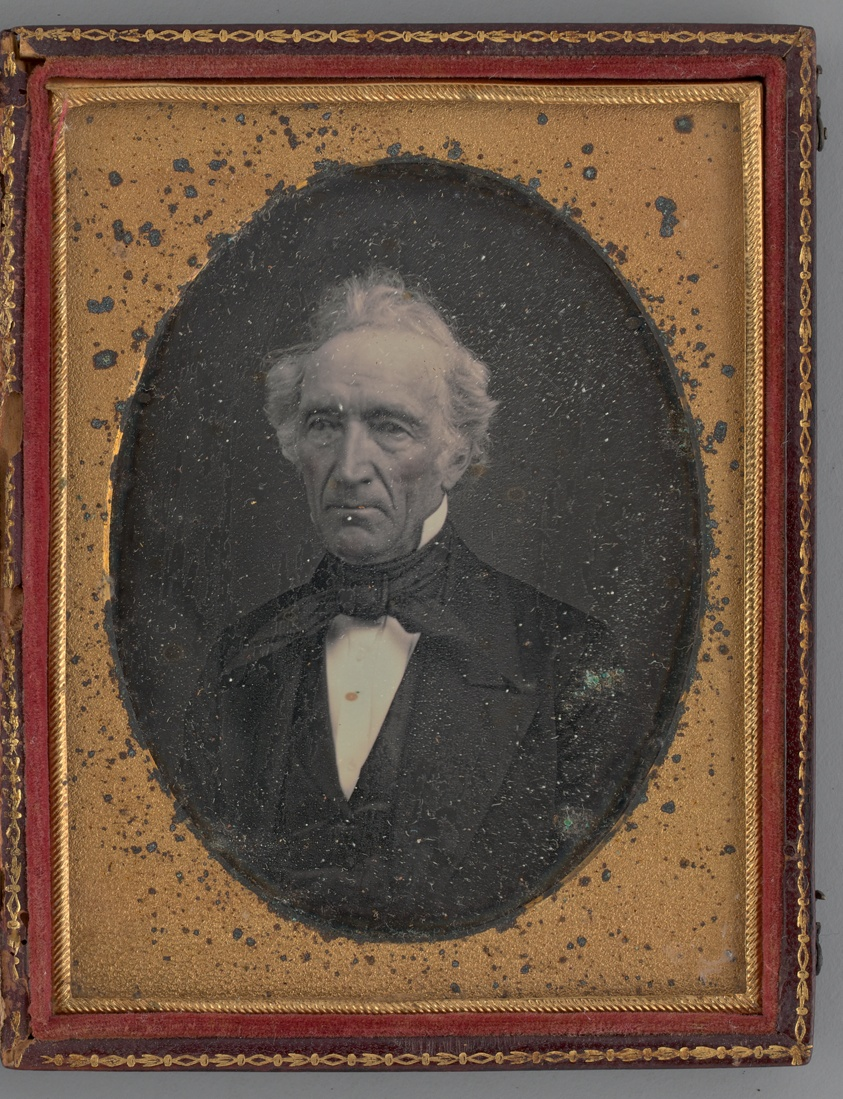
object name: Photograph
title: Untitled (Portrait of a Man)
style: 19th century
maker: Unknown maker; American, 19th century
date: 1854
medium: Daguerreotype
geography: United States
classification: portrait; photograph; photographic process; photography; portrait; daguerreotype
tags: lundberg collection, Male, portrait, portraits, portraits: male subject